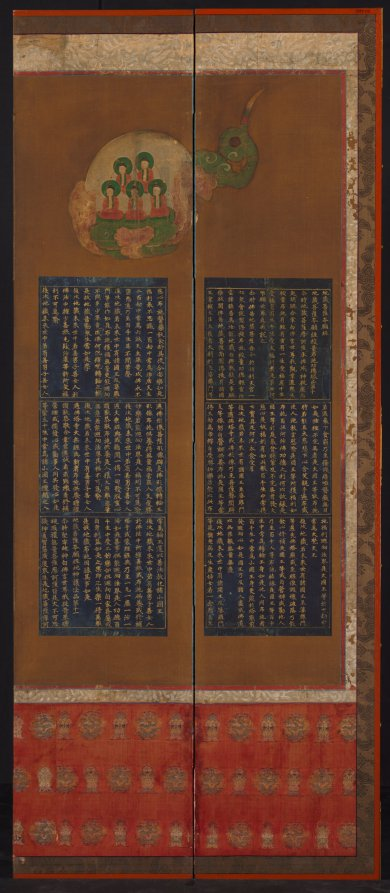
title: Buddhist Deities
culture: Korea, Joseon dynasty (1392–1910)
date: 1700s–1800s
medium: Four-panel folding screen; ink and color on silk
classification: Painting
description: This painting is a fragment of a much larger banner painting, now preserved by mounting on a four-panel continuous folding screen. On the back are Buddhist sutra pages, with text written in gold ink on indigo dyed paper.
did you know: This painting is a fragment of a much larger banner painting.